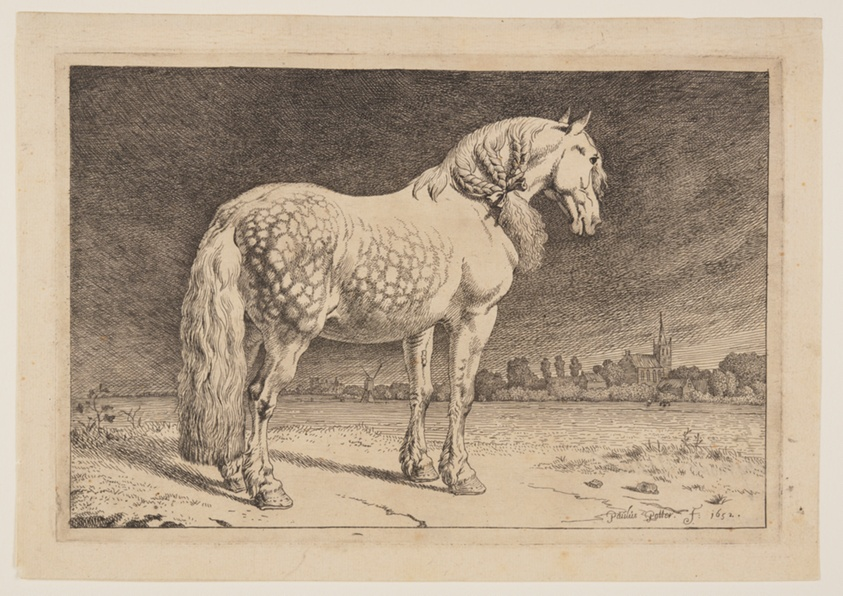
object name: Print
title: The Frisian Horse, from Series of Horses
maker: Paulus Potter (Dutch, 1625–1654)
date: 1652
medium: Etching on ivory laid paper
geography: Netherlands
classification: print; paper; prints and drawing; etching